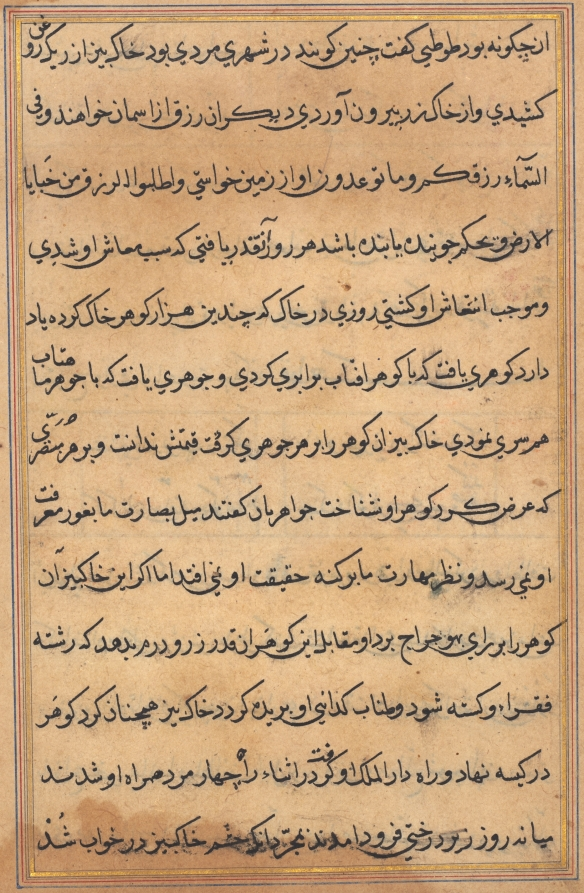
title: Page from Tales of a Parrot (Tuti-nama): text page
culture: Mughal India, court of Akbar (reigned 1556–1605)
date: c. 1560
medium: gum tempera, ink, and gold on paper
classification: Painting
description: The text of this manuscript was adapted, edited, and revised by Ziya al-Din Nakhshabi in 1329–30 from an earlier compilation called Gems of Nocturnal Conversations, written as a gift for the Sultan of Delhi. Turkic by ethnicity, but Persian-speaking, Nakhshabi settled in India. He was a religious cleric from Central Asia belonging to the mystical Sufi order of Islam. He rewrote and revised the earlier work, renamed it the Tuti-nama, and made the language more elegant and proper than the previous version.